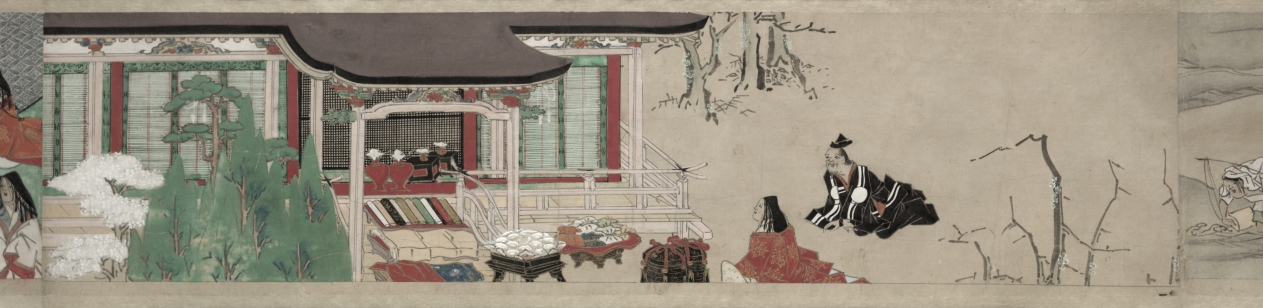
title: The Saltmaker's Story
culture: Japan, Edo period (1615–1868)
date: early 1600s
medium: One of a pair of handscrolls; ink, color, and gold on paper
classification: Painting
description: Once read and copied by girls at New Year’s celebrations and included in dowries, The Saltmaker’s Story is a rags-to-riches tale in which daughters are gifts from the gods. Despite his simple outlook, the main character progresses from humble roots as an associate at Kashima Shrine to the elite status of grandfather of the emperor through the intervention of the Kashima deity. The Saltmaker’s Story is traditionally presented in a set of three scrolls, but the text of this set has been removed by a previous owner, who remounted the illustrations as a pair. The paintings of this one take us from right to left through the first half of the tale.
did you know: This handscroll originally had texts before its paintings, but the texts were removed.